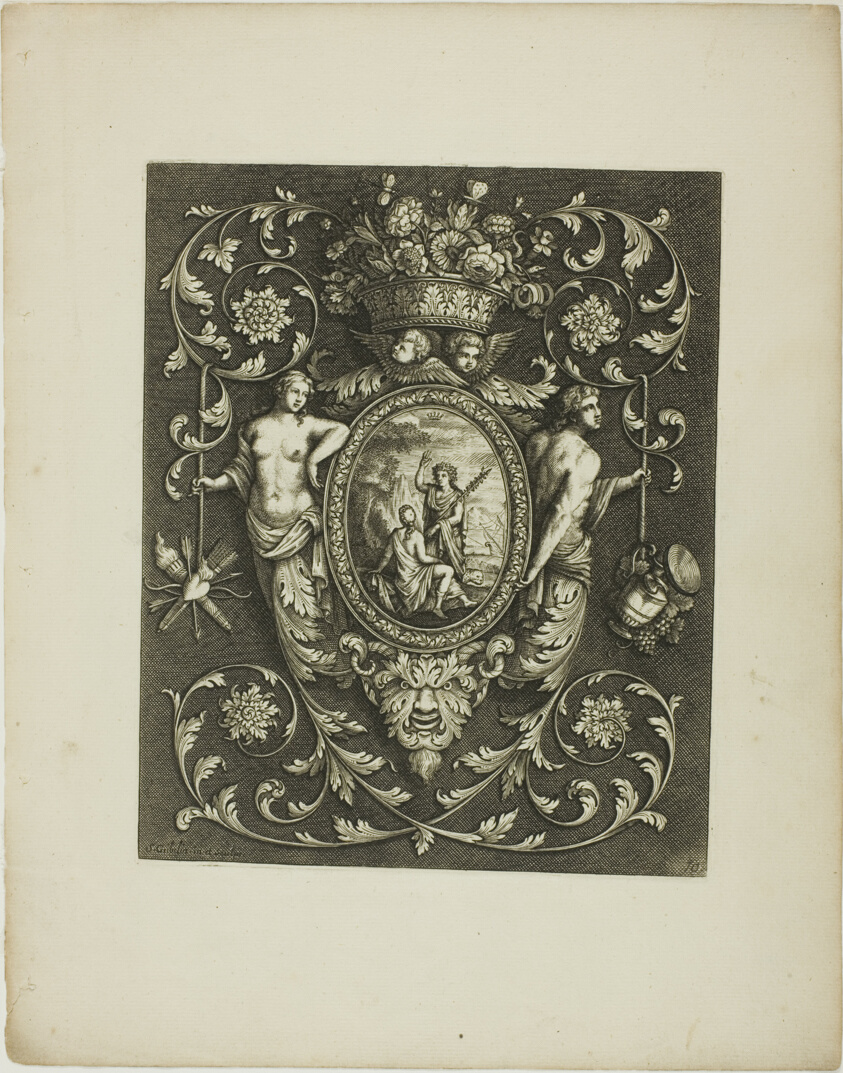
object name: Print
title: Plate Ten, from A New Book of Ornaments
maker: Simon Gribelin II; French, 1661-1733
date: 1704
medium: Engraving on paper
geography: France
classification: engraving; print; prints and drawing